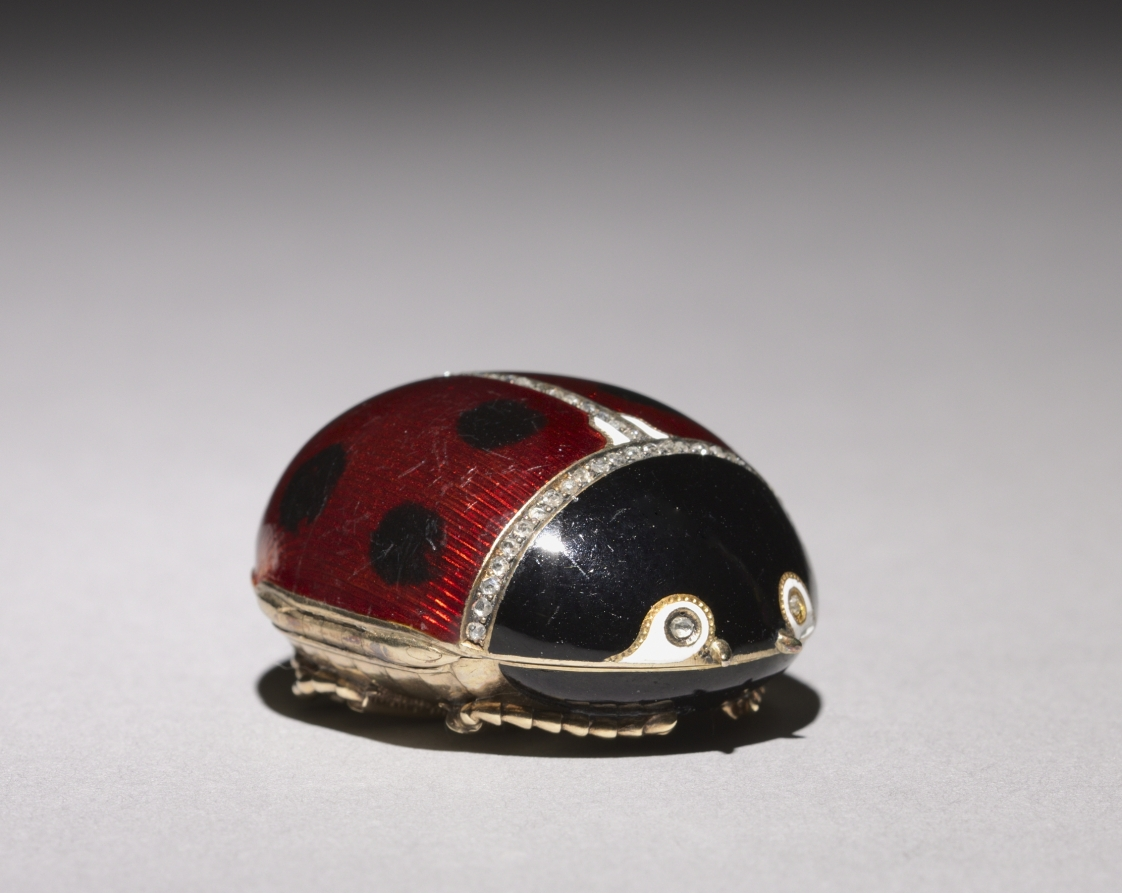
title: Ladybird Beetle Pillbox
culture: Russia, St. Petersburg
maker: House of Fabergé (Russian, 1842–1918)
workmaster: Mikhail Evlampievich Perkhin (Russian, 1860–1903)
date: 1896–1903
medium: gold, enamel, diamonds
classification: Miscellaneous